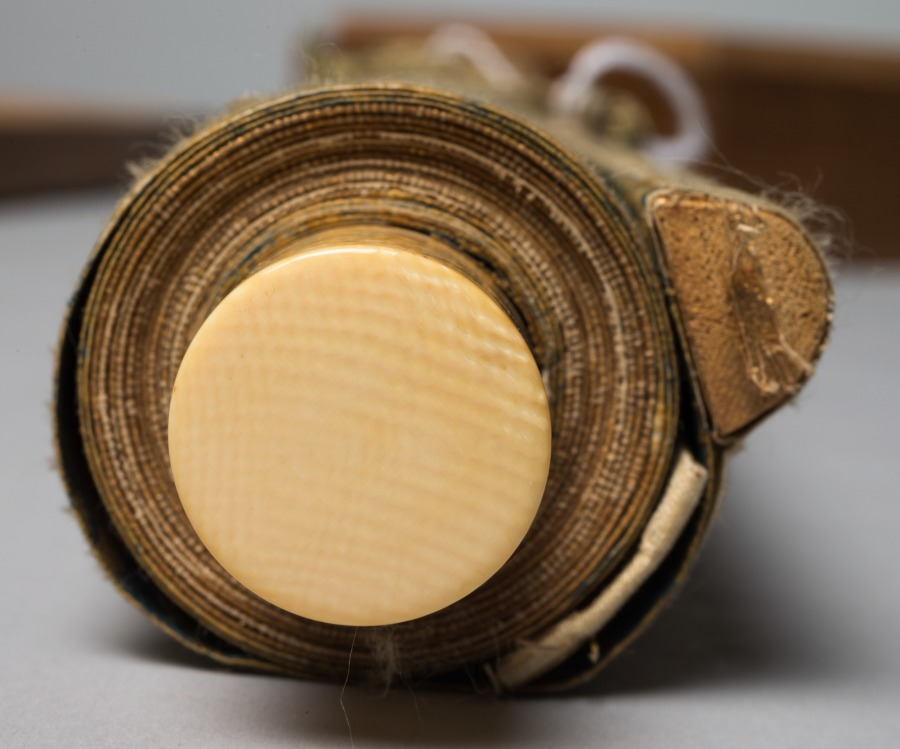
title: A Sage with Tiger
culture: Japan, Edo period (1615–1868)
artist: Kano Tan’yū (Japanese, 1602–1674)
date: 1661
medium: One of a triptych of hanging scrolls; ink and slight color on silk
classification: Painting